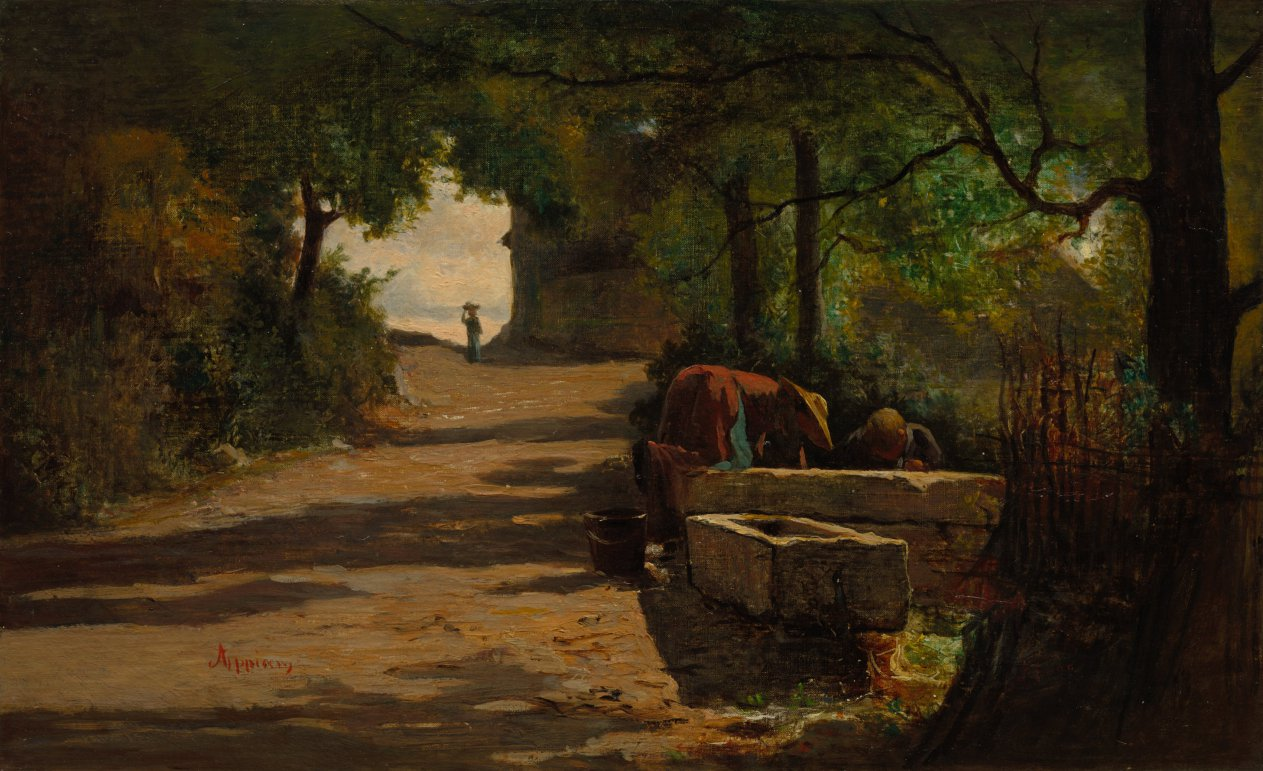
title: Well at the Side of a Road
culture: France, 19th century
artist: Adolphe Appian (French, 1818–1898)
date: 1860s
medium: oil on fabric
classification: Painting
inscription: Signed lower left foreground: Appian; lower right: Appian [false]